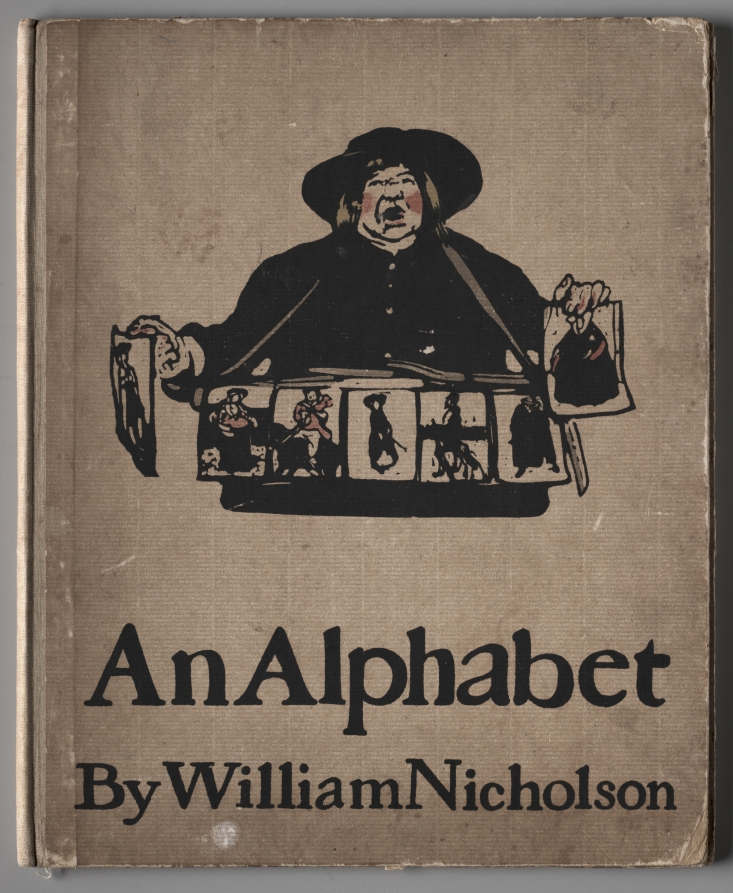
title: "An Alphabet:" Cover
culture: England, 19th century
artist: William Nicholson (British, 1872–1949)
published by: William Heinemann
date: published October 1897 (post-dated 1899)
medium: lithograph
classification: Print